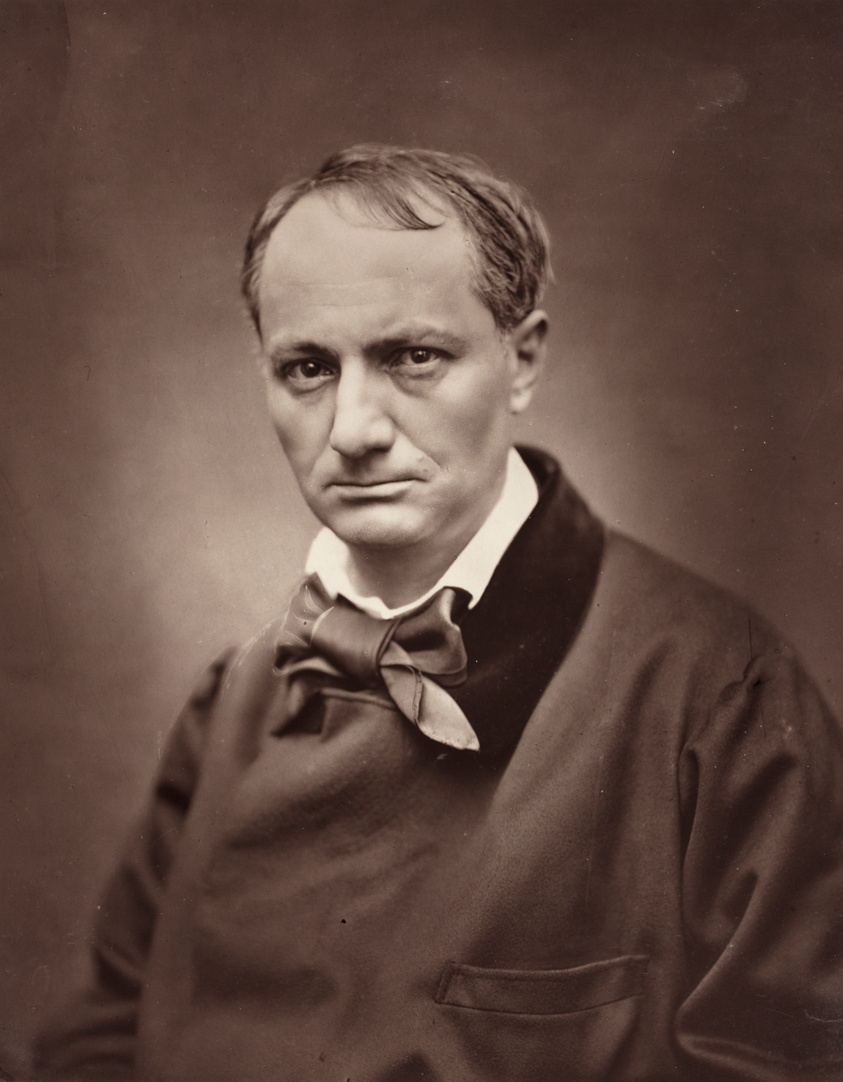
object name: Photograph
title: Charles Baudelaire (French poet, critic, and writer, 1821-1867)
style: 19th century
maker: Etienne Carjat (French 1828–1906)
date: c. 1863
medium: Woodburytype, from the periodical “Galerie Contemporaine Littéraire, Artistique” (1878), volume 5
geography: France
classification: woodburytype; photomechanical process; photography; photograph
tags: Collected by Hugh Edwards, Paris, Contemporaine Littéraire